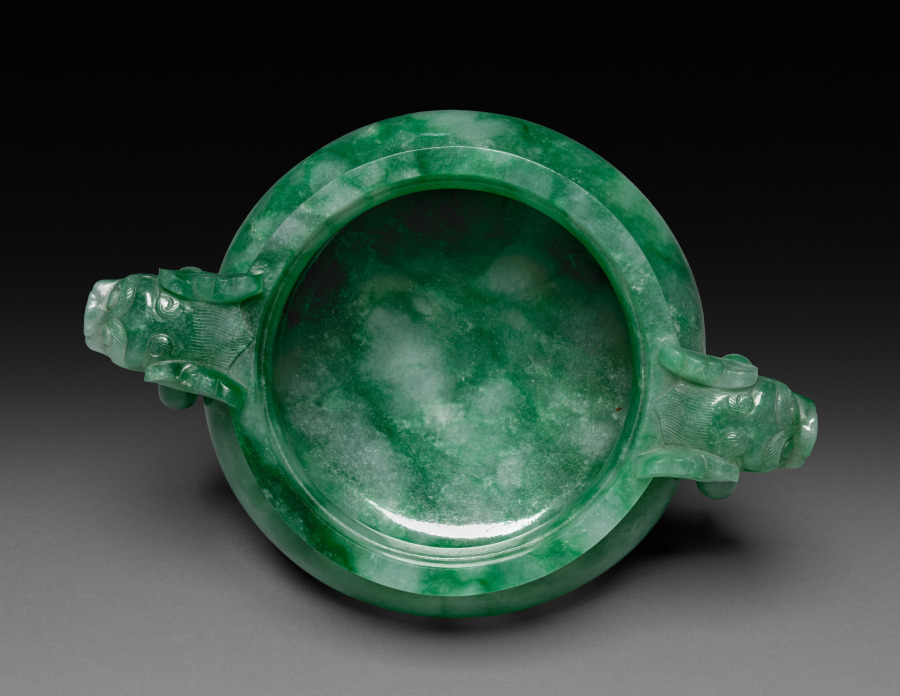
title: Incense Burner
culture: China, Qing dynasty (1644–1911), Qianlong reign (1736–95)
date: 1736–95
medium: green jade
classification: Jade